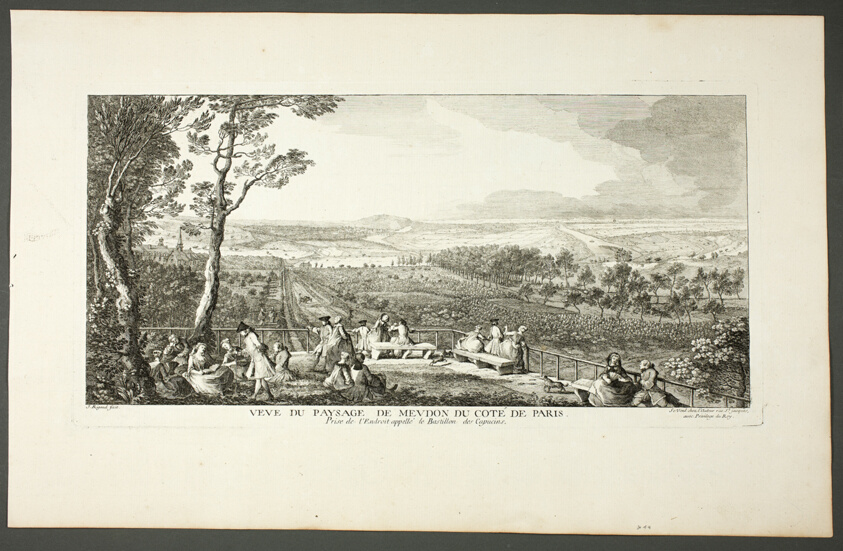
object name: Print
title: View of Meudon Landscape seen from Paris (Vue du Paysage de Meudon du coté de Paris), from the series Le Château de Meudon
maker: Jacques Rigaud (French, 1681-1754)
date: 1730-1740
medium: Etching in black on ivory laid paper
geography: France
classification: etching; print; prints and drawing